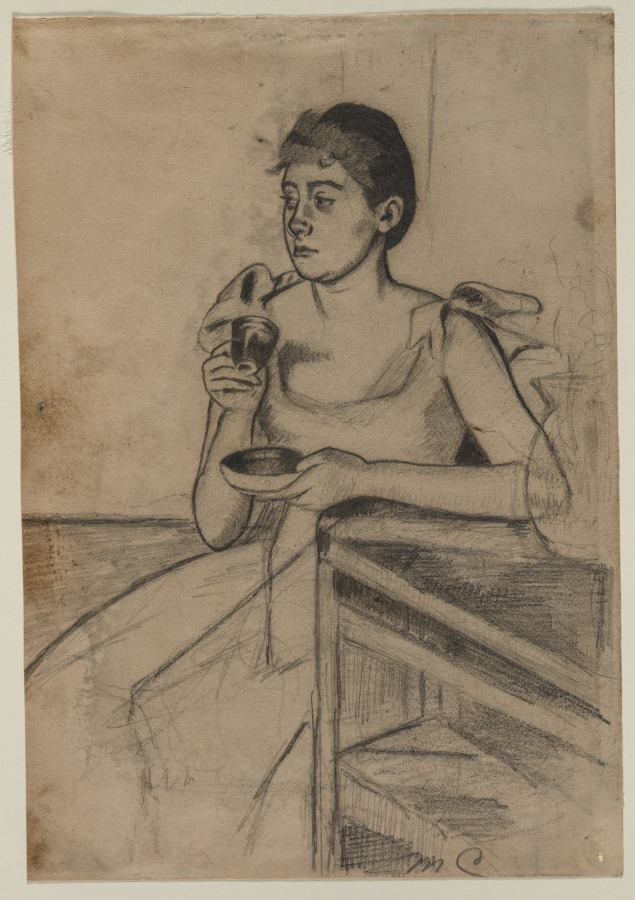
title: After-Dinner Coffee (recto); After-Dinner Coffee (verso)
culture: America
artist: Mary Cassatt (American, 1844–1926)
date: c. 1889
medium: graphite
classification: Drawing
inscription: inscribed in graphite, lower right: "M. C."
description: Cassatt exhibited prints for the first time in 1880 at the fifth Impressionist exhibition. As the decade progressed, she continued to show her graphic work alongside pastels and paintings. In the spring of 1890, at the Deuxième Exposition de Peintres-Graveurs, she showed a group of drypoints, remarkable in their delicacy and precision, as well as a group of prints made with a combination of aquatint and softground etching that appeared quickly drawn and spontaneous. After-Dinner Coffee is a study for a softground etching with aquatint.